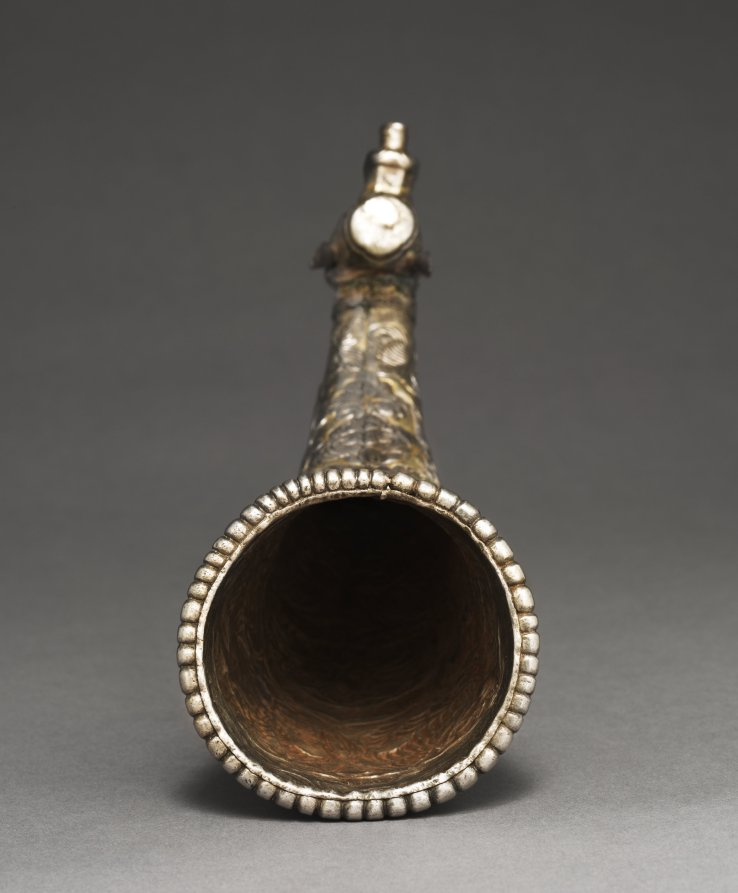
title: Rhyton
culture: Central Asia (Sogdiana) or Tibet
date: c. late 600s–early 700s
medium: silver with gilded foil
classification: Silver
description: The form of the animal-headed rhyton as a drinking vessel and the use of silver are evidence of cultural exchange with Persia, while the lush, luxurious quality of the design and the form of the lions and curling dragon on one side of the decanter reveal an awareness of Chinese forms. Poured into the large opening at the top of the horn, wine then flowed out through the small tube held between the parted lips of a bovine-like animal. To keep from spilling, drinkers could stop the flow of the liquid by holding a thumb over the lower aperture.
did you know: This drinking horn was a communal vessel which guests would pass around to share wine at parties.